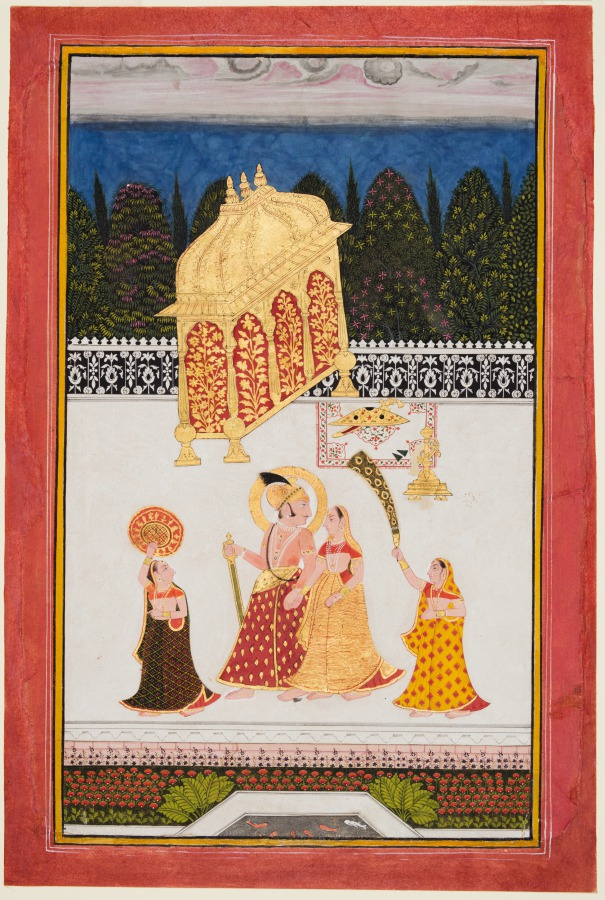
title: Maharana Ari Singh II of Mewar (r. 1761–73) with His Consort on a Terrace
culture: Northwestern India, Rajasthan, Rajput Kingdom of Mewar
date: c. 1761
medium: Gum tempera and gold on paper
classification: Painting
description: The ruler with his golden nimbus strolls with his beloved hand-in-hand on a white marble terrace. Soon, the couple will have enjoyed the hookah on the carpet and the raja will have laid down his sword and shield and retired with his consort to the golden chamber and drawn the curtains for privacy. The chamber sits at a precarious tilt, suggesting vigorous love-play within.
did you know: The garden below is full of row upon row of red poppies, suggesting the intoxicating heat of summer and the pleasures of opium.